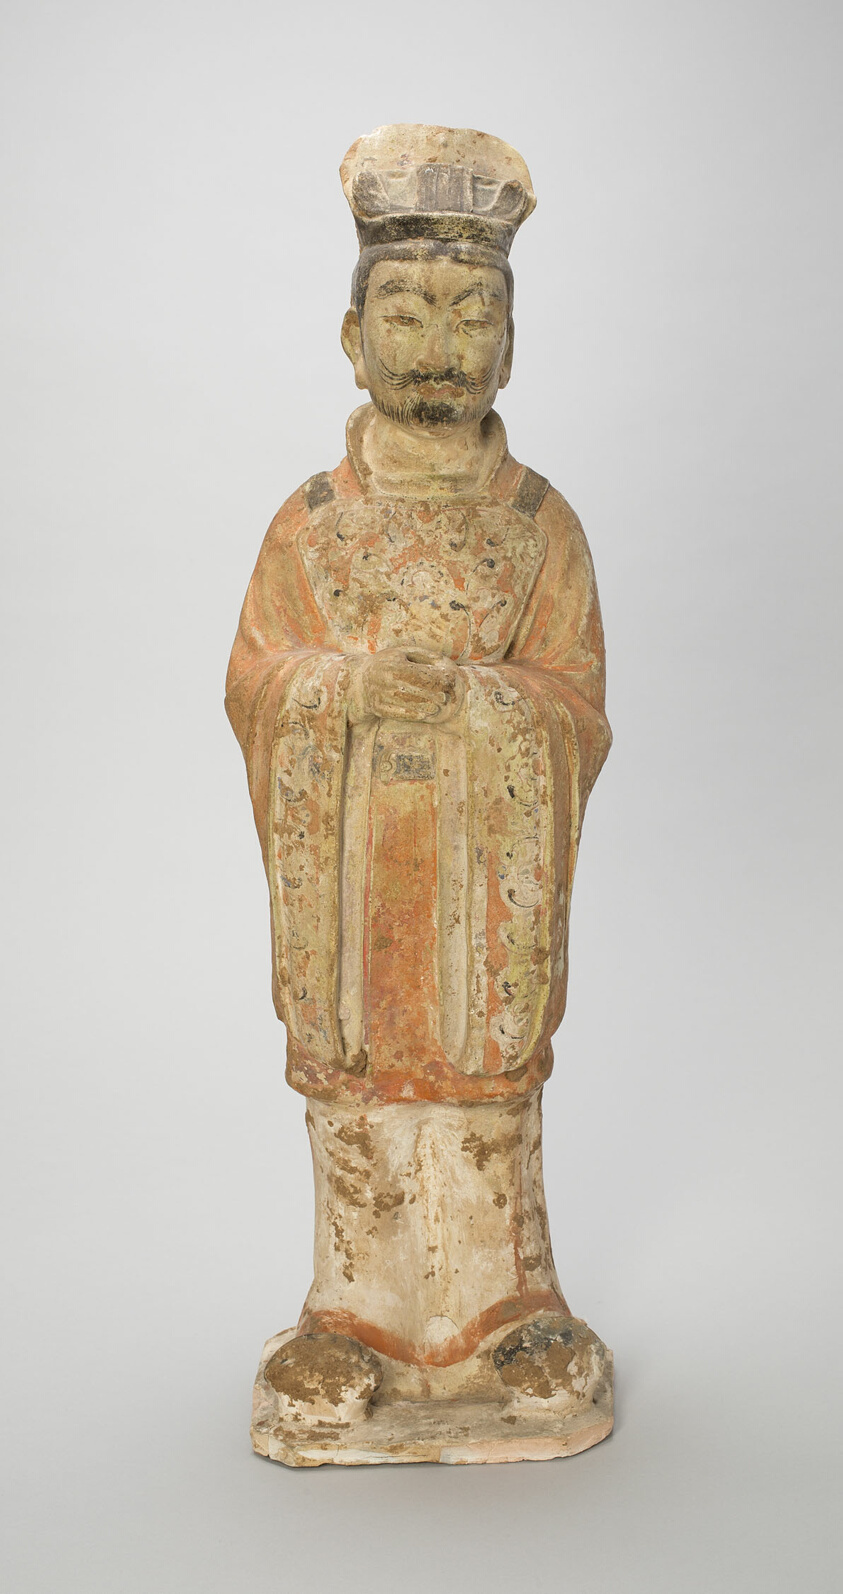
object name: Sculpture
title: Standing Court Official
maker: China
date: Style of Tang Dynasty (618–907), with later painted detail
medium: Earthenware with painted decoration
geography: China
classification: ceramics; asian art; sculpture